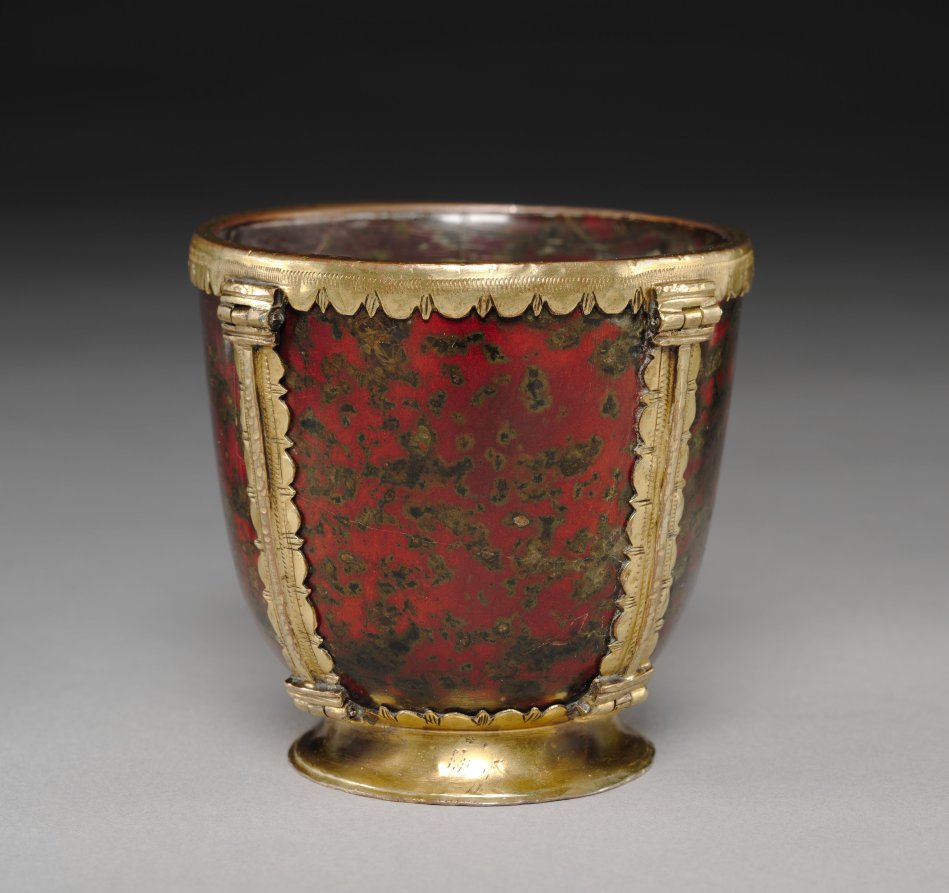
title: Calyx (Chalice)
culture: Byzantium, Middle Byzantine (843-1261)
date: 900s-1000s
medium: blood jasper (heliotrope) with gilt-copper mounts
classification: Glyptic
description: This hardstone vessel is shaped as a small bowl-shaped beaker which tapers slightly towards the base. It is crafted from jasper, a form of chalcedony, an opaque hardstone. The stone appears in a variety of colors, but in this instance is of the type known as "blood jasper," which assumes a deep ruby red color. The surface is highly polished and the vessel in enclosed in handsome gilt-copper mounts featuring a repeating lambrequin-type ornament. The calyx belongs to an exclusive and rare genre of object known today through about 30 surviving examples, most of which are preserved in the Treasury of San Marco in Venice. Because of its deep red color, blood jasper was highly prized by the Byzantines who saw it as a symbol of the blood of Christ. The original function of the vessel cannot be known with certainty. It may have assumed either a secular or liturgical function; however, the use of blood jasper would support the view that the calyx functioned as a liturgical chalice. Chalices in Byzantine Orthodoxy assumed multiple forms. Objects of this quality, materials, and execution are typically associated with circles of the Byzantine court. Such objects were often gifted to churches.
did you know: The Byzantines inherited their love of hardstones and their skill at carving them from the Romans.